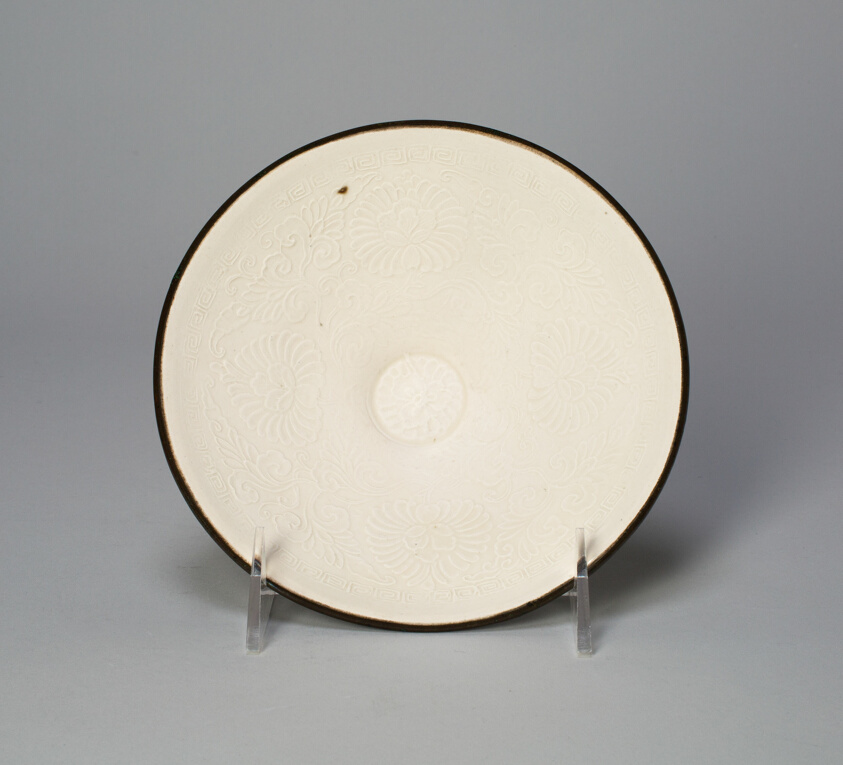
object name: Vessel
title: Bowl with Peony Scrolls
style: Chinese (culture or style)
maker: China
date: Jin dynasty (1115–1234), 12th century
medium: Ding ware; porcelain with underglaze mold-impressed decoration; metal rim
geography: China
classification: bowl; porcelain; dish (vessel); asian art; ceramics; vessel